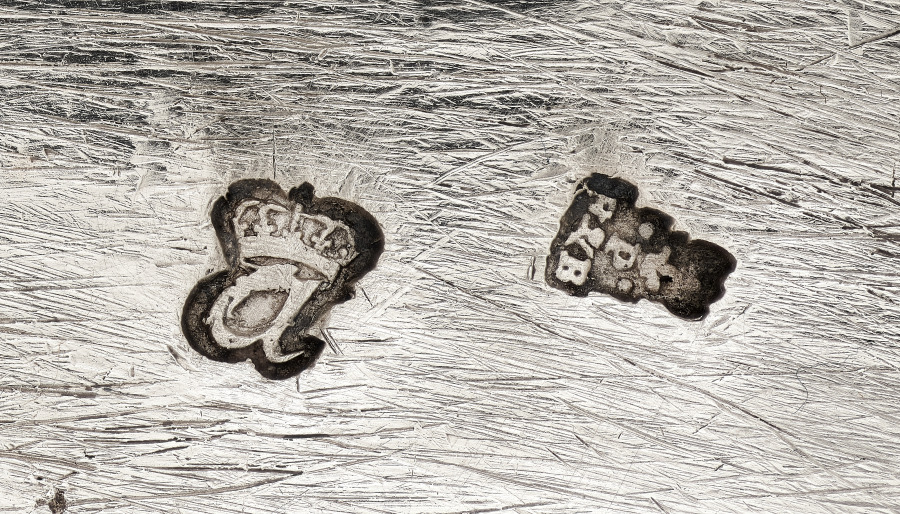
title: Tureen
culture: France, Paris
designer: Juste-Aurèle Meissonnier (French, 1695–1750)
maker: Pierre-François Bonnestrenne (French)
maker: Henry Adnet (French, 1745)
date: 1735–38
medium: silver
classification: Silver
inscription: engraved Meissonnier signature.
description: See entry for cover record 1977.182.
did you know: The langoustine, pigeon, and vegetables were cast using real examples giving the silver copies lifelike detail and appearance.